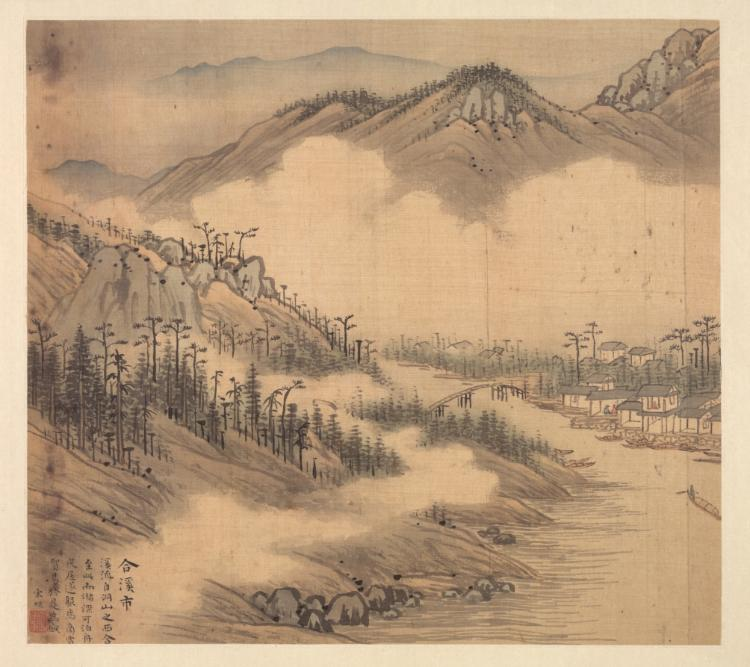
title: Hexi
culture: China, Jiaxing, Ming dynasty (1368–1644)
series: Eighteen Views of Huzhou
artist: Song Xu (Chinese, 1525-c. 1606)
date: c. 1588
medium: Album leaf; ink and color on silk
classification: Painting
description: By the 1500s, visits to historic and scenic sites in the lower Yangzi delta stimulated an increase of printed illustrated travel books. Topographical depictions of local scenery flourished. Leaves from this album illustrates sites around Lake Tai of the two adjacent counties Changxing and Wuxing (modern Huzhou). Song Xu, who lived intermittently in Jiaxing and Songjiang, must have passed through Wuxing by boat and thus knew the region. The paintings are inscribed with gazetteerlike notations, suggesting that the album was produced for clients as commemorative works, a travel guide, or for “armchair travel” (woyou) in one’s mind.